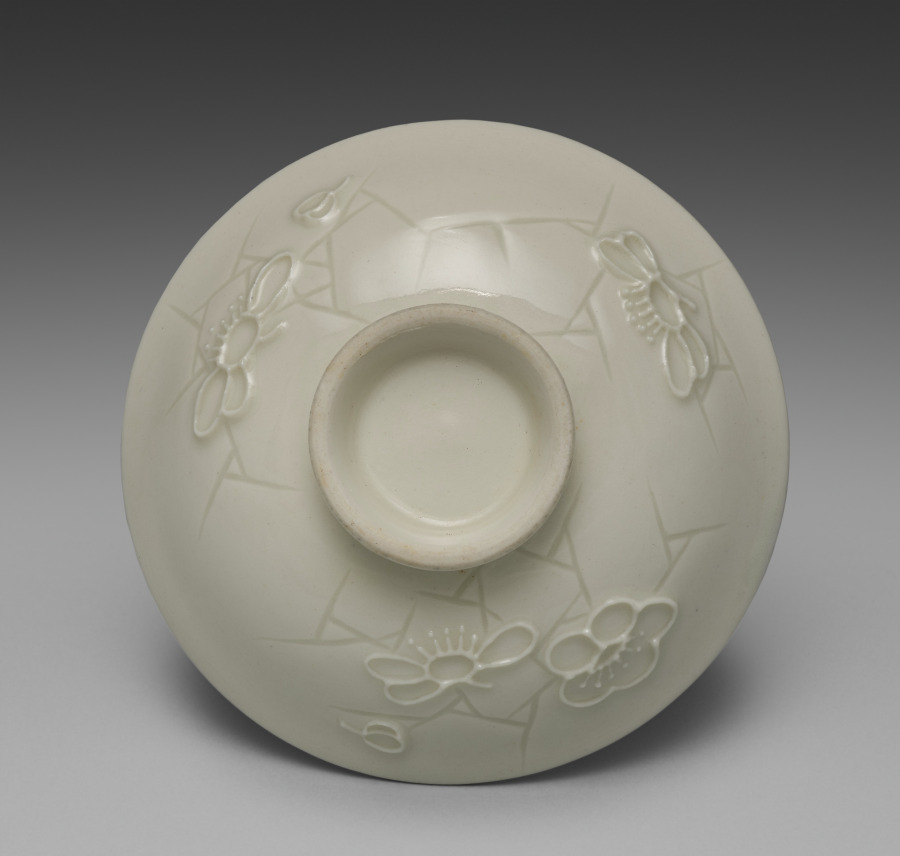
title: Cover for a Bowl from Dining Set with Plum Blossoms and Cracked-Ice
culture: Japan, Meiji period (1868–1912)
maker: Seifū Yohei II (Japanese, 1844–1878)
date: c. 1875–78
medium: Porcelain with molded designs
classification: Ceramic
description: Each item in this set has a delicate low-relief design of flowering plum branches over scattered, intersecting lines meant to resemble the cracked-ice surface of a frozen body of water and is signed on the base in gold pigment. While Yohei II produced many fine works in underglaze blue, like those produced by Kiyomizu Shichibei, he also made works in quite different styles later in his career, from the early 1870 s. In 1873, he was appointed purveyor to the Industrial Center of Kyoto Prefecture, a designation associated with Kyoto’s efforts to reach an international market through the port of Kobe; and from 1875 until his death, he was involved in national-level projects to present Japanese ceramics across the world. It was during this period that Yohei III was apprenticed to Yohei II, and it has been suggested that this set may in fact be an early example of Yohei III’s work, which he signed with his teacher’s name. Decorated with flowers resembling Japanese textile motifs, the set calls to mind the design of Yohei II’s pair of vases with plum blossoms in the Victoria and Albert Museum. Here, the elaborate trees created for a formal public exhibition setting have been translated into the approachable blossoms of the genteel domestic environment. While the designs are consistent across the pieces, each raised flower petal and pistil and each incised line in the ice was done by hand, so the cups, bowls, and dishes are similar yet unique. The bottoms of two boxes once identified the set’s owner, but the information has been deliberately obscured with black ink. However, inscriptions still visible appear to indicate two occasions, once at the end of July 1886 , and once again in June 1916 , when parts of the set were requested from Hokura in Niigata Prefecture. The location corresponds to a neighborhood in the present-day city of Jōetsu. The surname Tsuji 辻 also appears on a paper tag affixed to one of the box cloths. Future research may possibly reveal more about their provenance. A vase by Yohei III in a private collection combines the formal grandeur of the Yohei II vases in the Victoria and Albert Museum with the gentler design of this dining set, placing flowering plum trees against soft, scalloped-edge clouds resembling those in golden screens.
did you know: The dining wares have a creamy white coloration that the four boxes containing them identify as Korean in style.